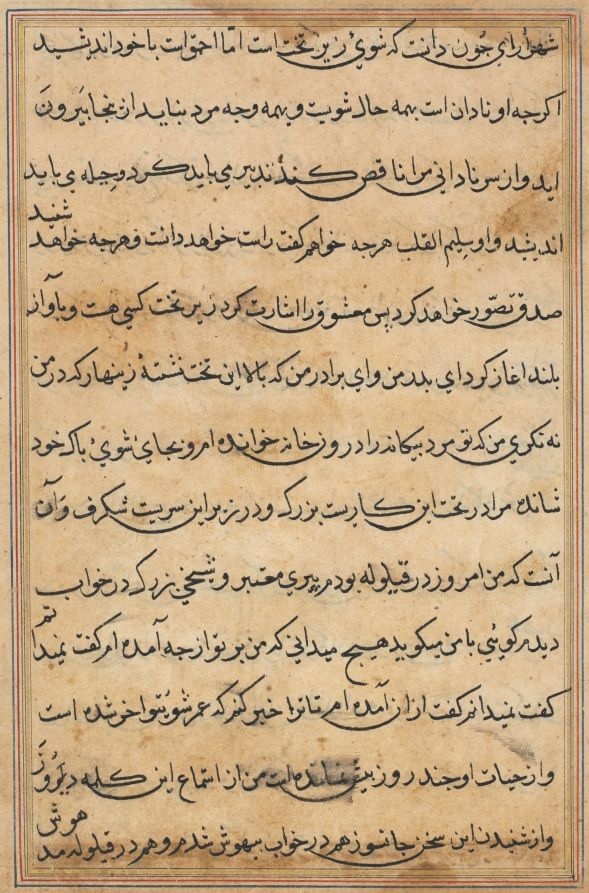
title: Page from Tales of a Parrot (Tuti-nama): text page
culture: Mughal India, court of Akbar (reigned 1556–1605)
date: c. 1560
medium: gum tempera, ink, and gold on paper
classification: Painting